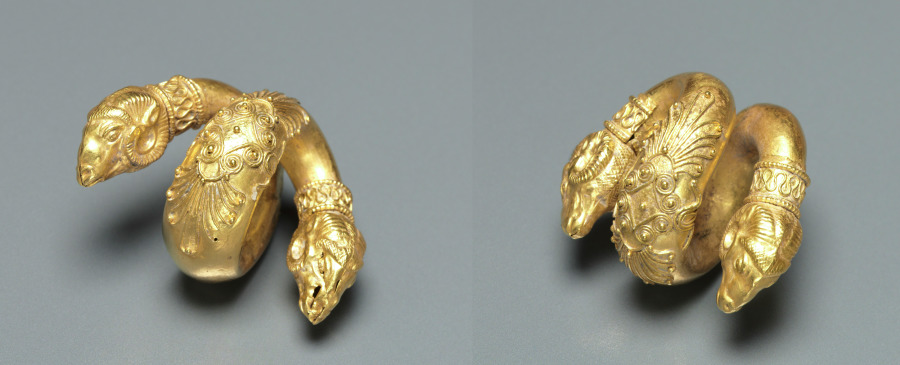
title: Pair of Earrings or Hair Ringlets with Ram Head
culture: Greece, Hellenistic period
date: 400s BCE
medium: gold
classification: Jewelry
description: The main spiral body of this ornament is made from a hollow tube, decorated in the center with a double palmette. Each end of the ornament is capped with a ram’s head above an elaborate collar. There are no join seams on the main tube, meaning it must have been cast as a spiral or otherwise as a tapered tube that was then bent into shape. Scholars believe that these helical pieces were used as earrings (perhaps with a separate attachment) or to hold hair in place.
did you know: Each of the ram heads was cast in two parts, as indicated by the visible seam down the middle of each head.